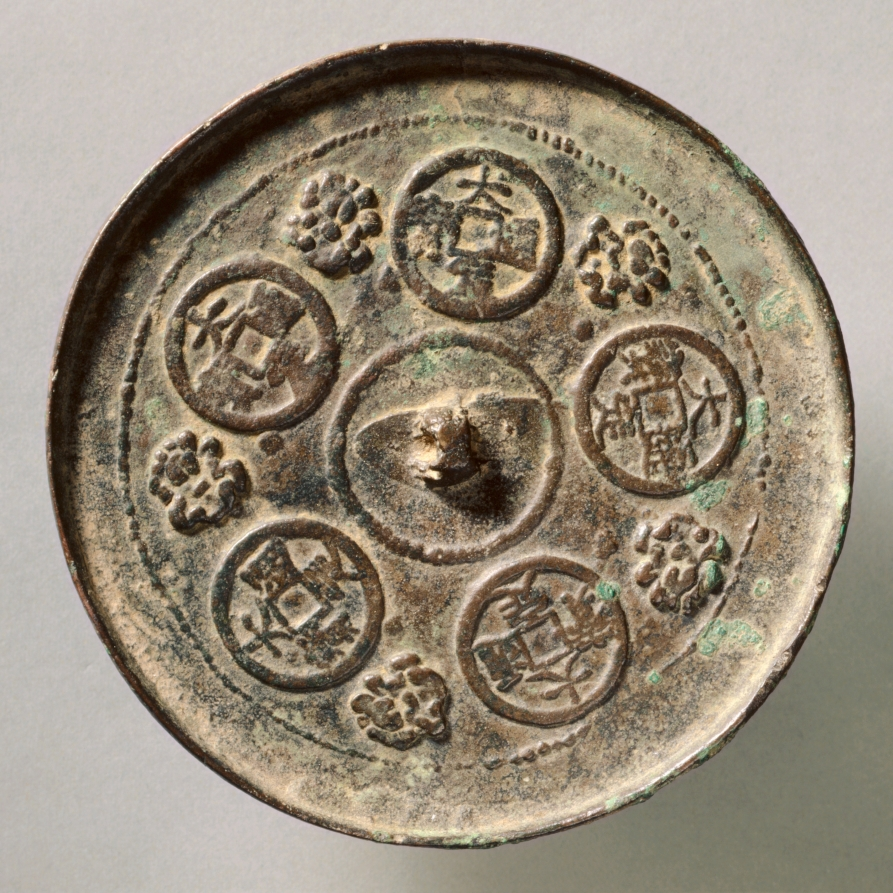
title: Mirror Featuring Dading Coins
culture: China, Jin dynasty (1115-1234)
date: c. 1178–1234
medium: bronze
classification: Metalwork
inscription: 大定通寶